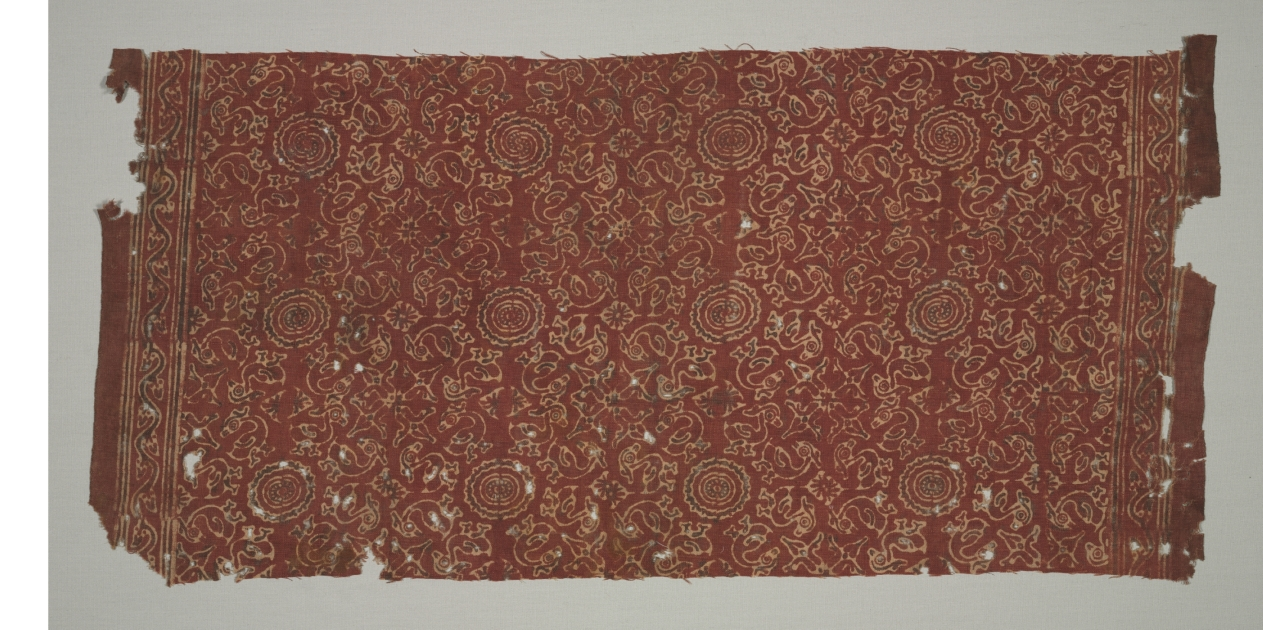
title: Fragment with geese circling lotus medallions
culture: India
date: 1400s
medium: plain weave: cotton, stamped mordant resist and dyed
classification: Textile